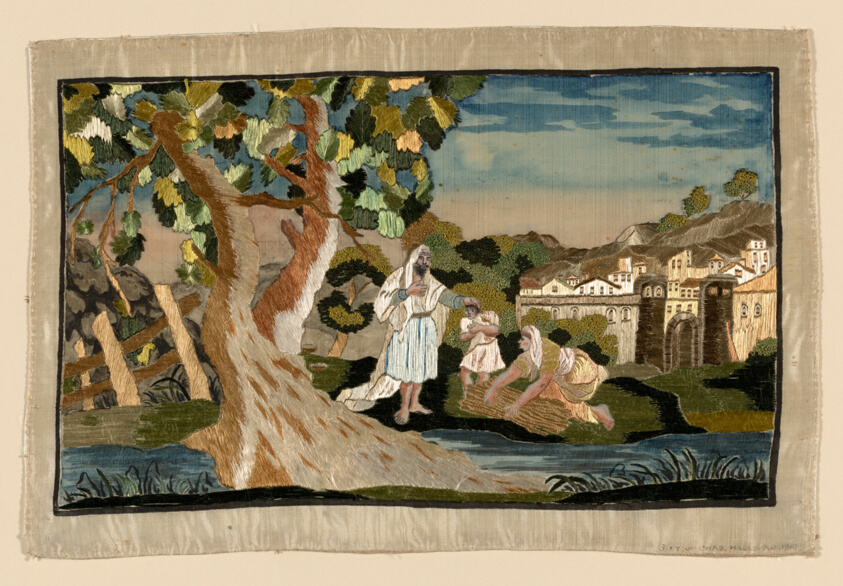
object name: Textile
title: Picture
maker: Sweden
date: 1801/25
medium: Silk, satin weave; embroidered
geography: Sweden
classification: textile; needlework (visual works)